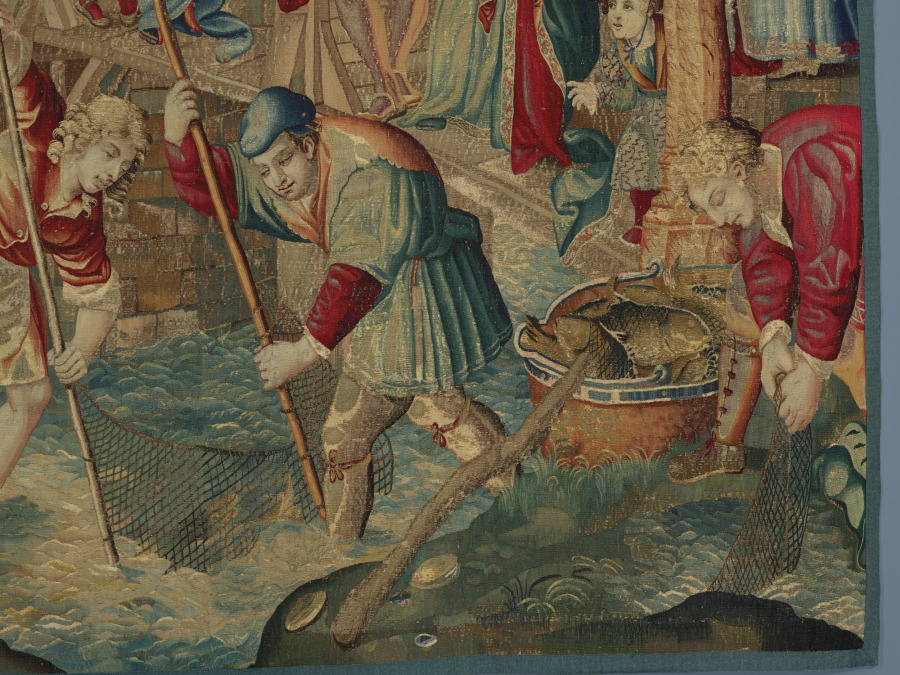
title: Spring: Fishing Scene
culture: France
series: Four Seasons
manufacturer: possibly by Gobelins Manufactory (France, Paris, est. 1662)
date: designed c. 1535, woven mid- to late 1600s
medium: Wool, silk, and gold filé: tapestry weave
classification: Tapestry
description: In this springtime scene, two fishermen wade in a river, dragging a net suspended between two poles. A noble couple on a bridge gestures toward other fishermen, who occupy the other side of this scene in other extant examples of this tapestry with a larger picture plane. In the background, townspeople walk on bridges that lead to the gateway of a town with brick walls and portals. In the far distance, farmers till the soil to sow new seeds, another typical activity associated with spring. The trees on the hills are just beginning to sprout new buds.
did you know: Spring was considered to be a season of courtship and romance; perhaps the gentleman on the bridge in the red cap is trying to catch the attention of the lady next to him.